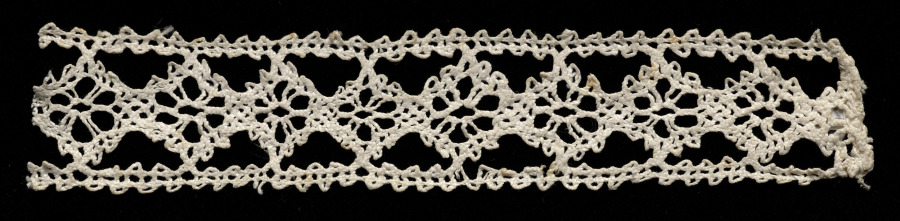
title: Lace Insertion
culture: Italy, Venice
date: 1540–60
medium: Bobbin lace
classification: Lace